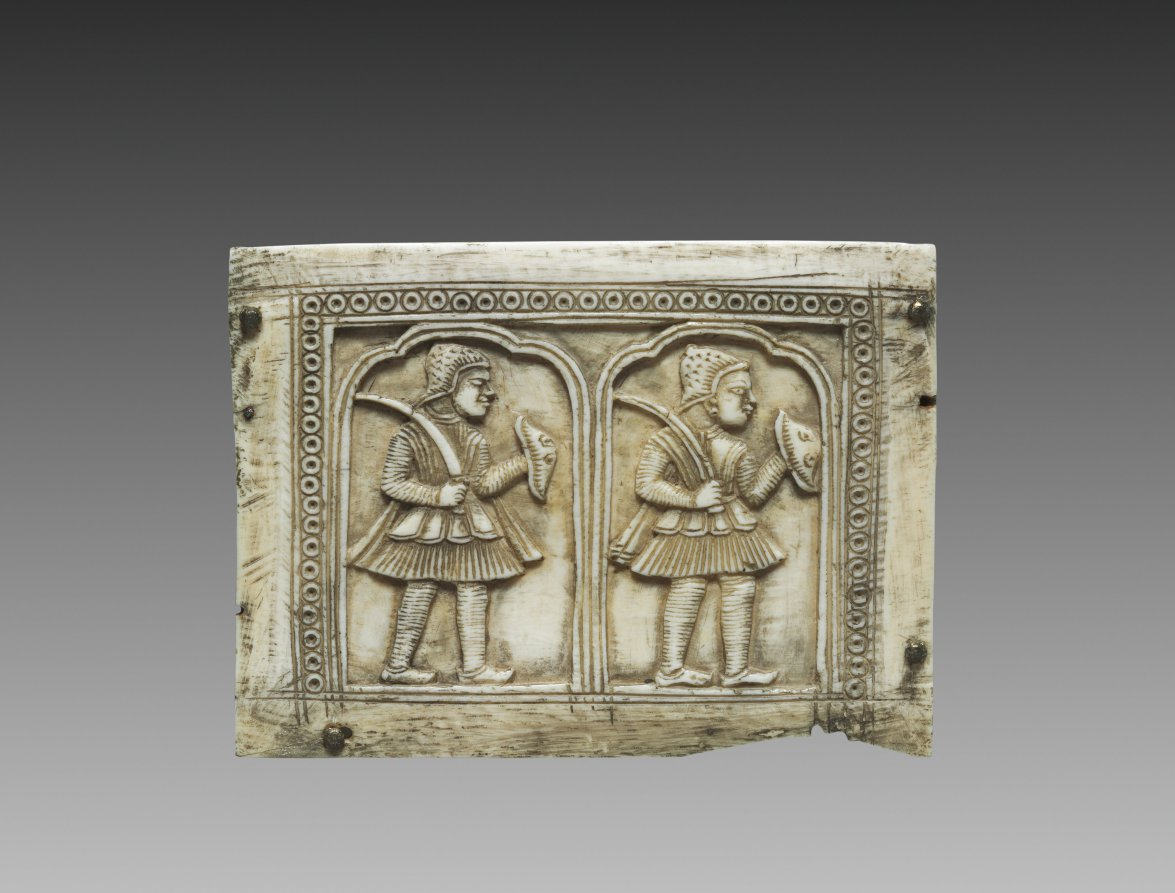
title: Panel from a Box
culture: India, North East Deccan, Visakhapatnam district, Mughal Dynasty (1526-1756)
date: c. 1700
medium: ivory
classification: Ivory